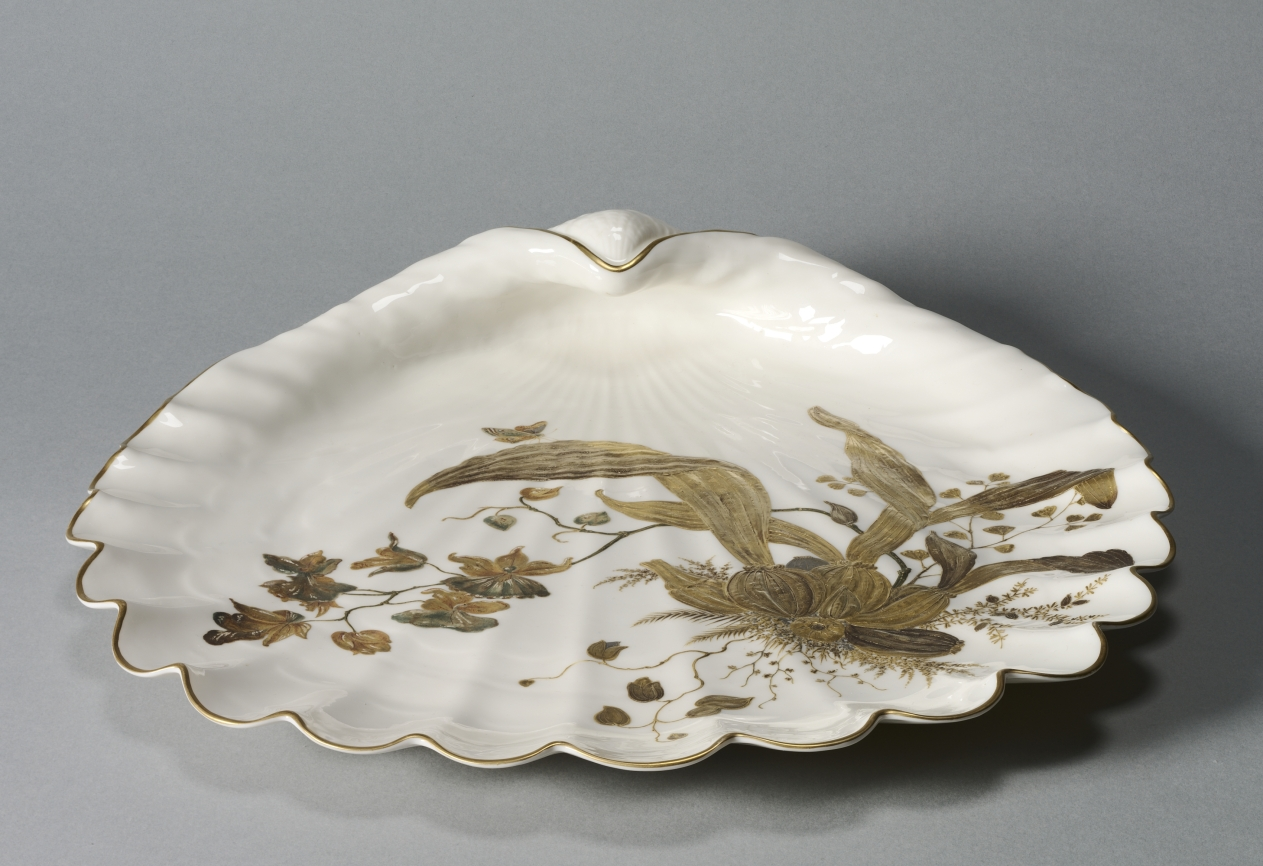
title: Tray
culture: America, New Jersey, Trenton, late 19th century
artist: Ott & Brewer Company (American)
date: 1882–1890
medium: porcelain with gilt decoration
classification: Ceramic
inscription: "Belleek,&" is printed above a horizontal crescent moon with the word "Trenton" in it. Initials "0" and "B" are printed over each tip of the crescent.